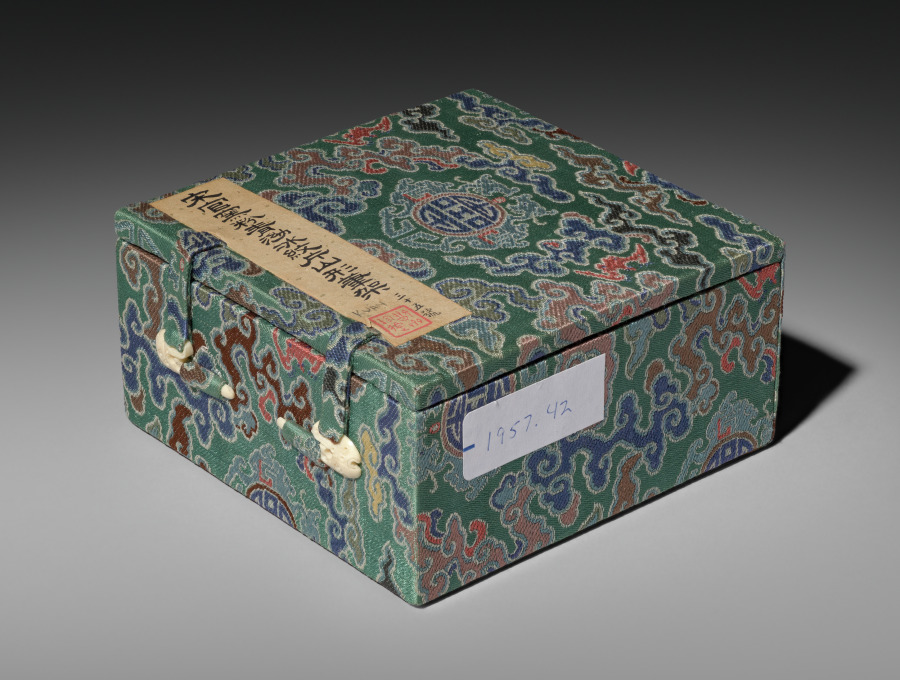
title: Brush Rest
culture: Southeast China, Zhejiang province, Southern Song dynasty (1127–1279)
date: 1127–1279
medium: glazed stoneware, Guan ware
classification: Ceramic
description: This brush rest, shaped like a mountain range, is covered with a thick and soft gray-blue crackled Guan ware glaze that pools in the deeper areas, giving the mountain range a hazy appearance as if enshrouded in white mists. Guan ware was produced in the imperial kilns in Hangzhou, the Southern Song dynasty capital.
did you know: There are twelve "hills" on this mountain-shaped brush rest.